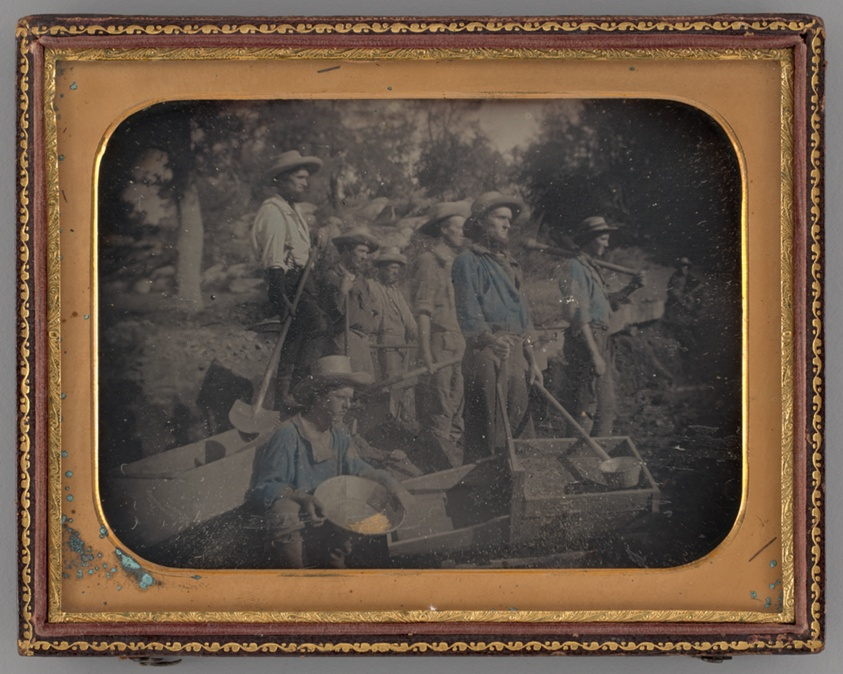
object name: Photograph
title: Untitled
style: 19th century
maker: George Howard Johnson; American, 1823-1879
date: 1853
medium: Daguerreotype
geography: United States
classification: portrait; photograph; photographic process; photography; portrait; daguerreotype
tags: lundberg collection, portraits, gold mining, gold rush, Male, portraits: male subject, portraits: multiple subjects